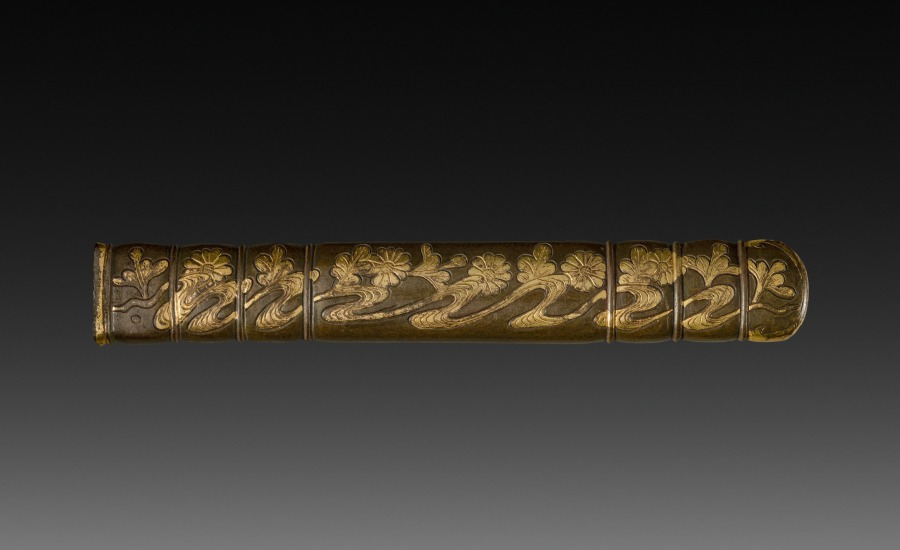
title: Knife Handle (Kozuka)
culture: Japan, Edo period (1615–1868)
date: c 1800s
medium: inlaid bronze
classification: Metalwork